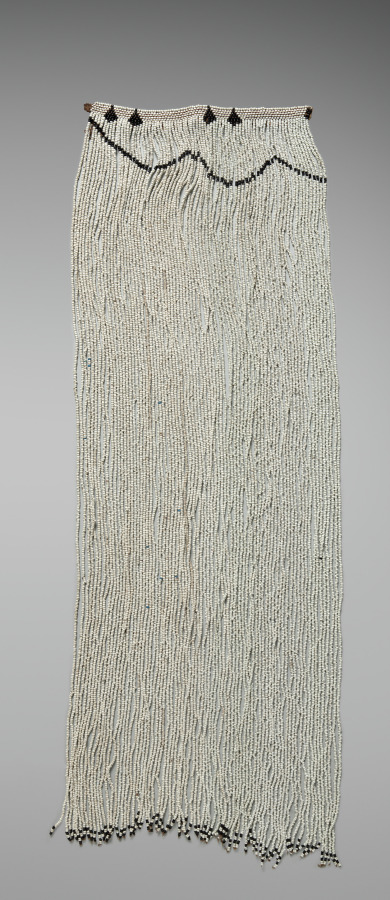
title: Royal ceremonial beadwork: breast cover (incebetha)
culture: Africa, Southern Africa, South Africa, Southeast Cape Region, Unknown female Xhosa-style maker(s)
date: 1800s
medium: Glass beads, hide, and sinew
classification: Textile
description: Elite Xhosa women once wore beaded garments like this on festive occasions. Made almost completely from imported Venetian or Bohemian glass beads, they were overt status symbols. Imported beads functioned as money for the Xhosa between about 1770 and 1829. These garments’ female maker carefully selected beads of the highest quality, uniform in color, shape, and size. Made in the same shape as the pendant, a swallowtail-shaped apron (CMA 2010.206) worn under the skirt completed the ensemble.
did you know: The beads to make an ensemble like this cost several cattle in the early nineteenth century, an amount most couldn't afford.